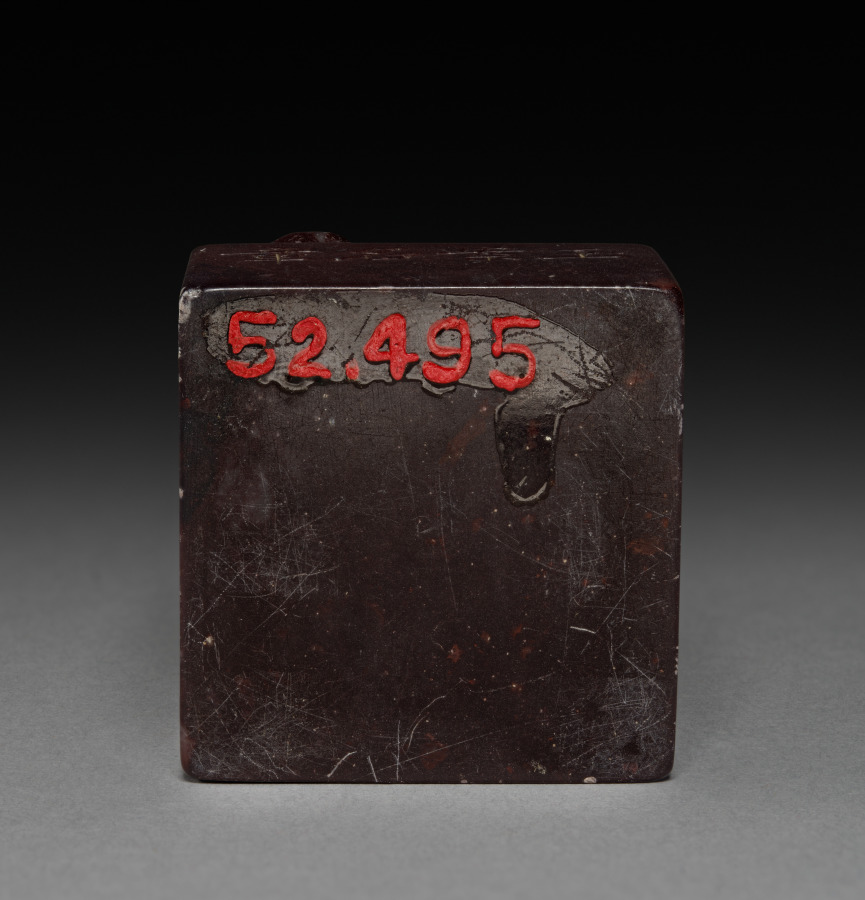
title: Seal with Two Qilin Playing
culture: China, Qing dynasty (1644-1911)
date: 1849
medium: onyx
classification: Stone